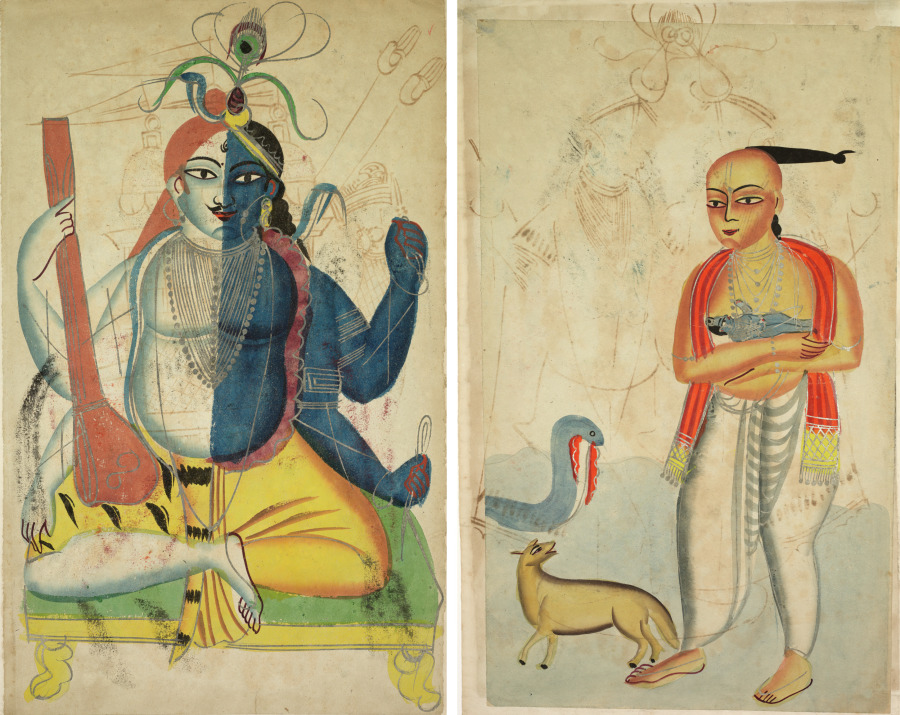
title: Leaf from a Kalighat album: Hari-Hara (recto); Vasudeva (Krishna's Father) Fleeing with Krishna Encounters a Cobra and a Jackal (verso)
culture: Eastern India, Bengal, Kolkata, Kalighat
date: c. 1890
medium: Gum tempera, graphite, ink, and tin on paper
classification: Painting